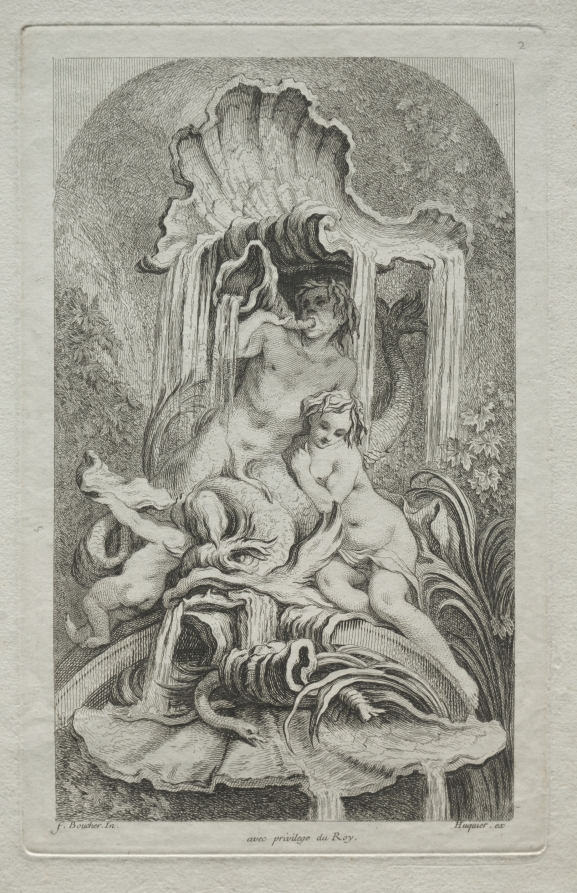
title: Book of Fountains: No. 2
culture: France, 18th century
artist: Gabriel Huquier (French, 1695–1772)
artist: after François Boucher (French, 1703–1770)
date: c. 1736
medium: etching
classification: Print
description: Boucher was one of the most prolific designers of ornament prints. With their aquatic motifs and gracefully curving and scalloped forms, these designs for fantastic, even bizarre fountains perfectly illustrate the whimsical Rococo approach. Derived from the French word for shell, rocaille, the Rococo was a light, playful style filled with shell motifs (which stemmed in part from a vogue for collecting shells), naturalistic curves, scrolls, and plant forms.